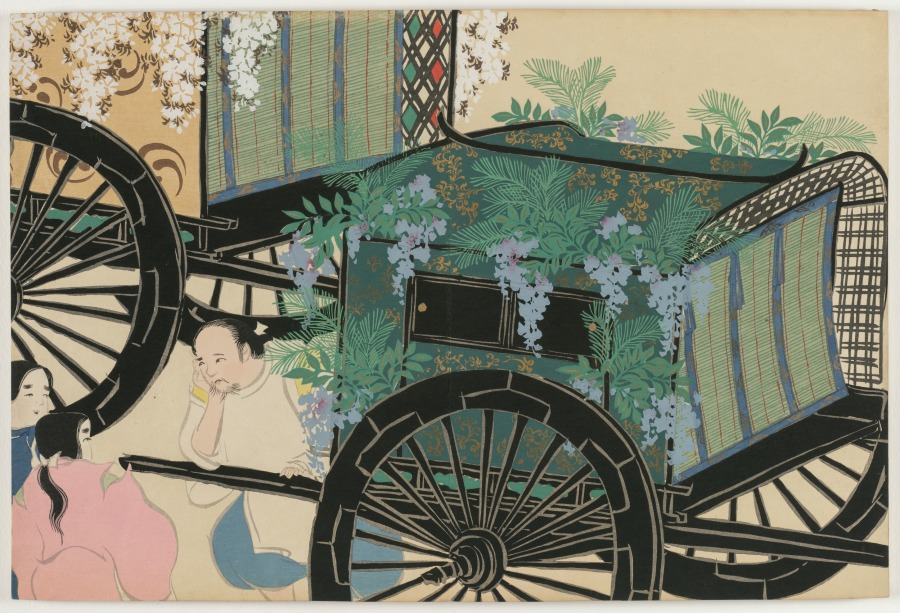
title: Flowers of a Hundred Worlds (Momoyogusa): Flower-draped Carts (Hanasashiguruma)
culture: Japan, Meiji period (1868–1912)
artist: Kamisaka Sekka (Japanese, 1866–1942)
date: 1909–10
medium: color woodcuts with gold and silver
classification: Bound Volume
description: This print from a set of three woodblock printed albums displays the graphic design prowess of Kamisaka Sekka. The images were first distributed one by one to subscribers to the series but later were reissued in bound form, like this book, for mass consumers. Each print features a vignette taken from nature or Japanese literature. Many of the scenes have a long history in Japan, originating in the 900s or 1000s and having been interpreted by all manner of artists since that time. Sekka’s selections hew closely to precedents from the Rinpa style originated by painter Tawaraya Sōtatsu (c. 1570–c. 1640) and calligrapher Hon’ami Kōetsu (1558–1637).